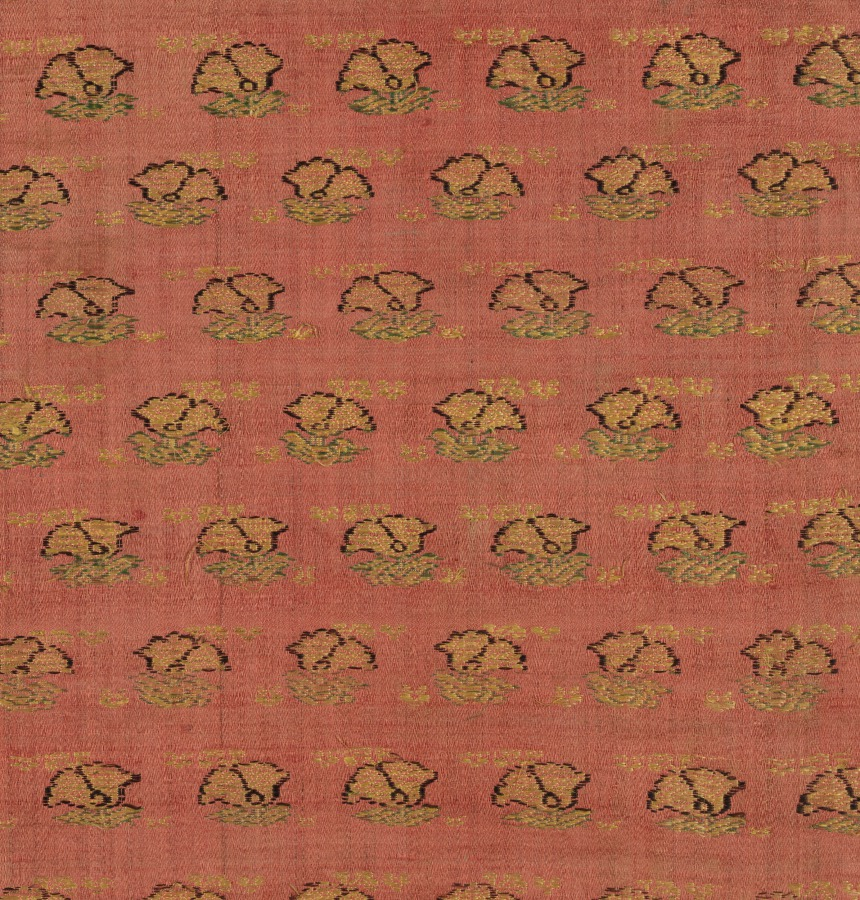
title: Brocade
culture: India, Gulbarga, 18th-19th century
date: 1700s - 1800s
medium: brocade, "himru"; silk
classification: Textile